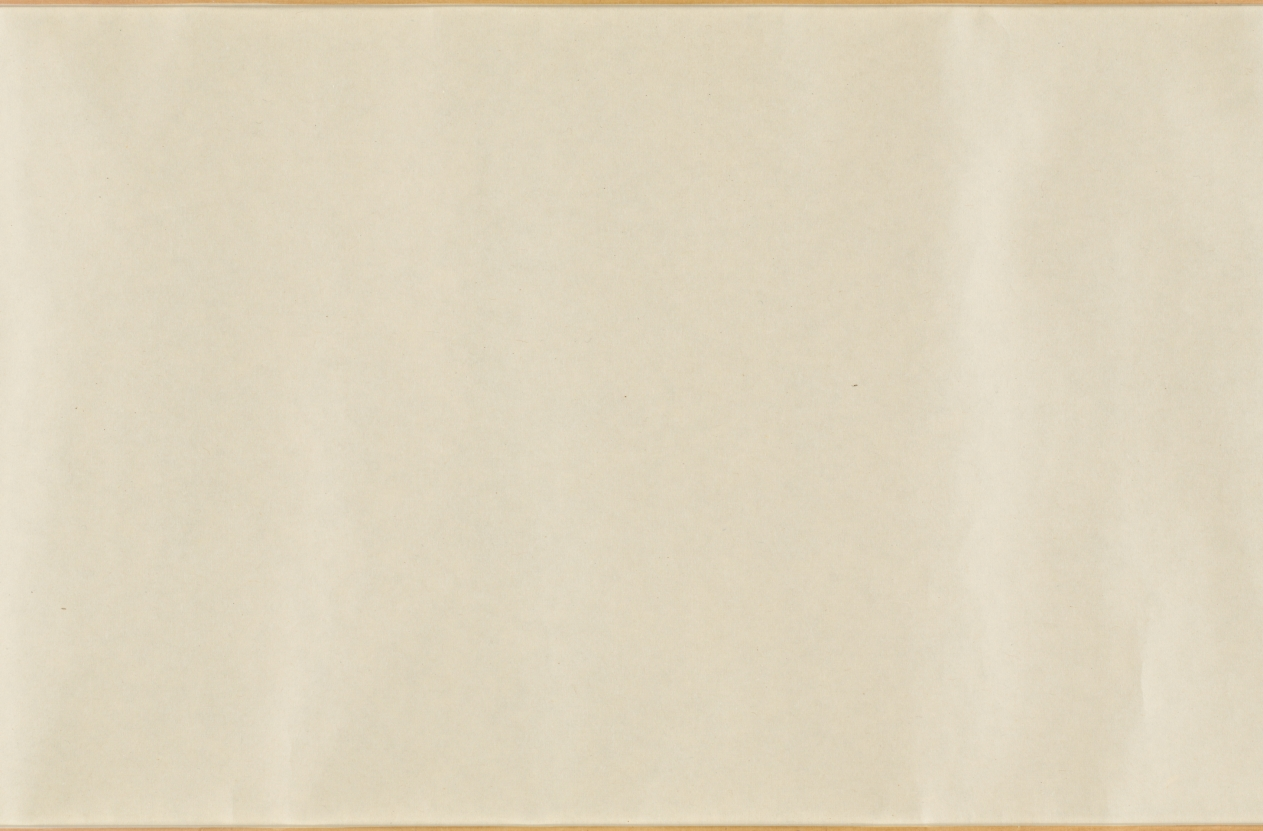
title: Selections from the New Collection of Japanese Poems from Ancient and Modern Times (Shinkokin wakashū) with Printed Designs of Chinese Lions and Crab Finger Grass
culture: Japan, Edo period (1615–1868)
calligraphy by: Hon'ami Kōetsu (Japanese, 1558–1637)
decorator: Tawaraya Sōtatsu (Japanese, c. 1570–c. 1640)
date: early 1600s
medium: handscroll; ink, gold, and silver on paper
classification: Calligraphy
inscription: Seal: 光悦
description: Hon’ami Kōetsu was a calligrapher and craftsman who frequently collaborated with the painter Tawaraya Sōtatsu, considered the first master of the Rinpa school. Kōetsu brushed seven poems from the autumn section of a poetry anthology onto dyed paper with motifs designed and printed in gold and silver by Sōtatsu.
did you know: Before becoming a master painter of screens, Tawaraya Sōtatsu painted fans.